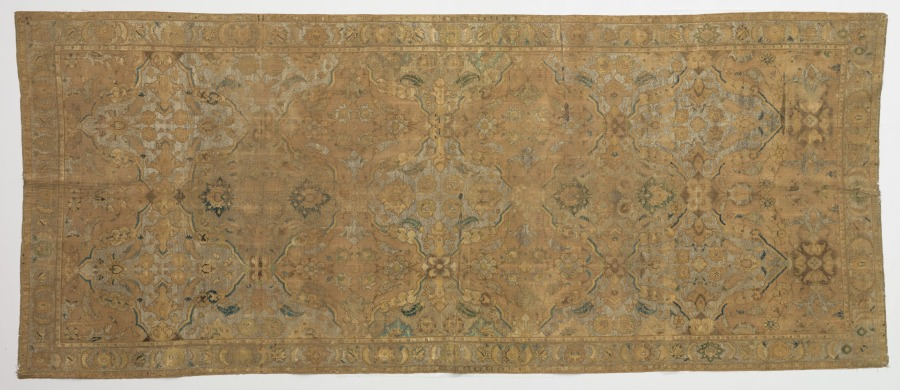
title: Carpet, so-called "Polonaise"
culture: Iran, 17th century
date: 17th century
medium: senna knot: silk, silver and gold filé brocading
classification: Carpet